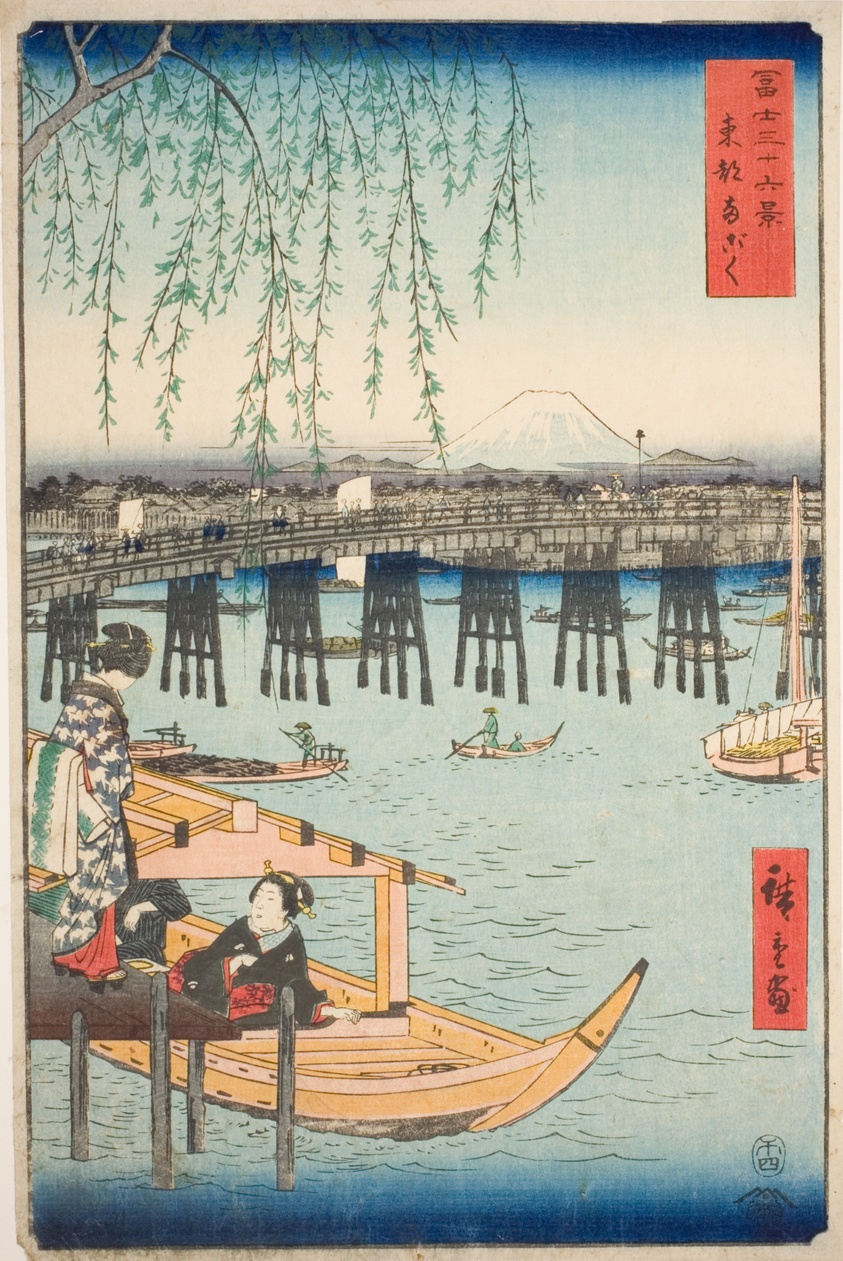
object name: Print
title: Ryogoku Bridge in the Eastern Capital (Toto Ryogoku), from the series "Thirty-six Views of Mount Fuji (Fuji sanjurokkei)"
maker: Utagawa Hiroshige 歌川 広重; Japanese, 1797-1858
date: 1858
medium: Color woodblock print; oban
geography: Japan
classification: woodblock print; print; asian art